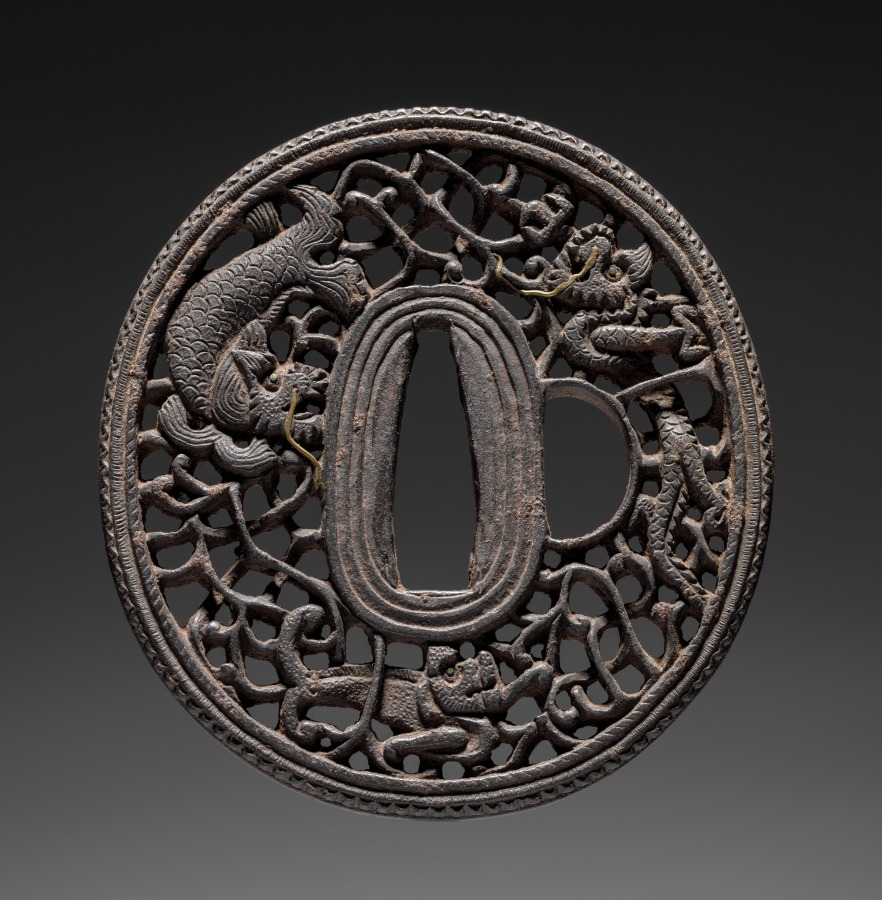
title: Sword Guard (Tsuba) with Dragon, Lion, and Sea Monster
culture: Japan, possibly Edo period (1615-1868)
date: c. 1615–1868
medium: iron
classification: Arms and Armor